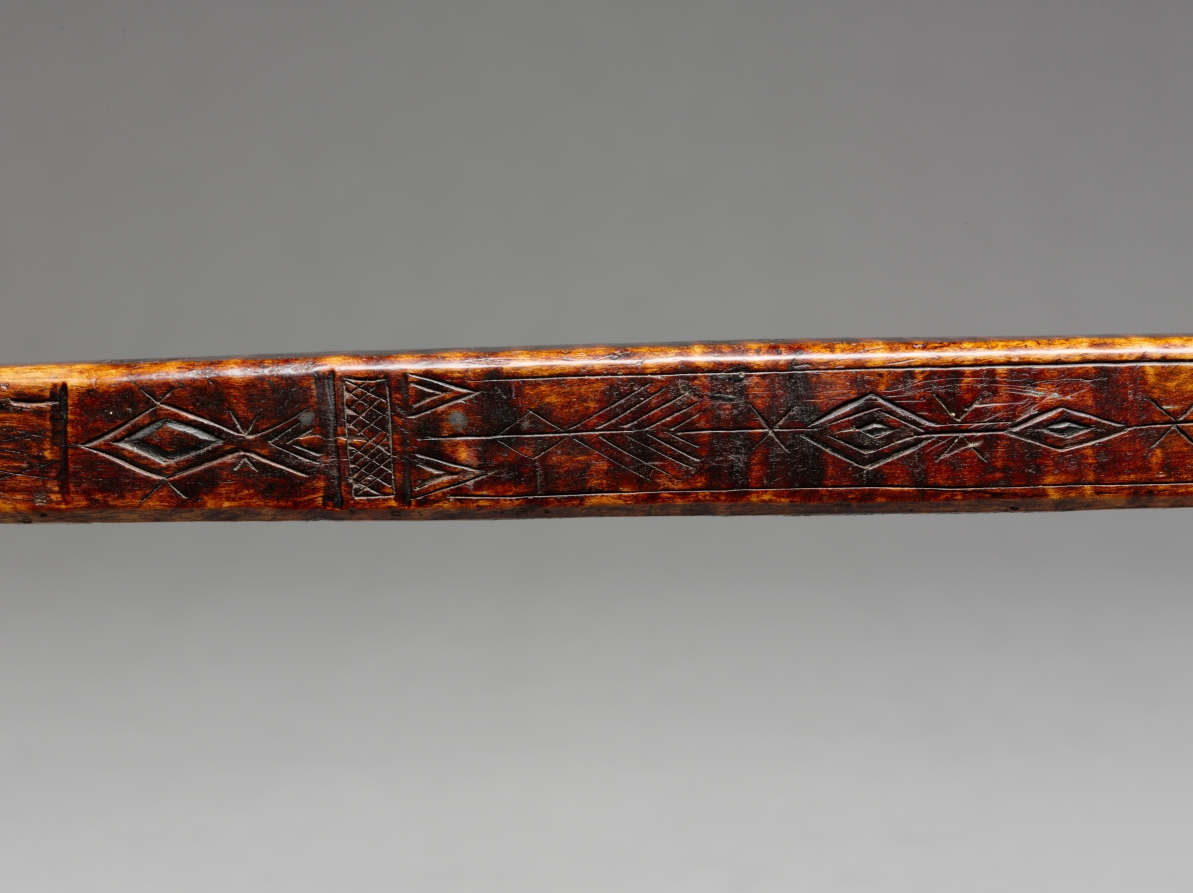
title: Ball-Headed War Club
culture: Native North America, Northeastern Woodlands, Great Lakes, Anishinaabe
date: late 1700s–early 1800s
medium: wood (maple?)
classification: Implements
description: The ball at the striking end of this club is clenched in an abstract, jawlike form that likely refers to a protector animal who endowed the owner with power. Incised on the shaft is a rich record of doodemag (singular, doodem, “totem”)—animals representing other-than-human progenitors from which Anishinaabe peoples trace their descent. (The Anishinaabeg, a group of related Great Lakes nations, include the Odawa, Ojibwe, Potawatomi, and others.) Included is an antlered creature, perhaps a caribou, along with mammals, birds, and powerful spirit beings: the thunderbird, its wings outstretched, and perhaps the long-tailed underwater panther. When this example was made, clubs had become symbols of status and earlier ways of life, having been replaced as favored weapons by metal tomahawks and European firearms. Today, clubs are part of powwow regalia.